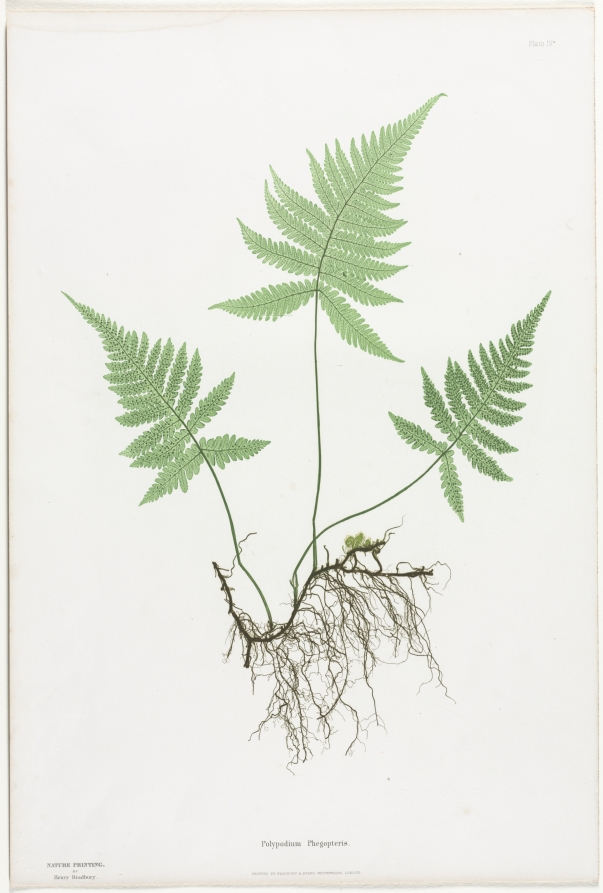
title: Ferns of Great Britain and Ireland: Polypodium Phegopteris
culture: England, 19th century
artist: Henry Bradbury (British, 1829–1860)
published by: Bradbury and Evans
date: 1855–1856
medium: nature printing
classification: Print